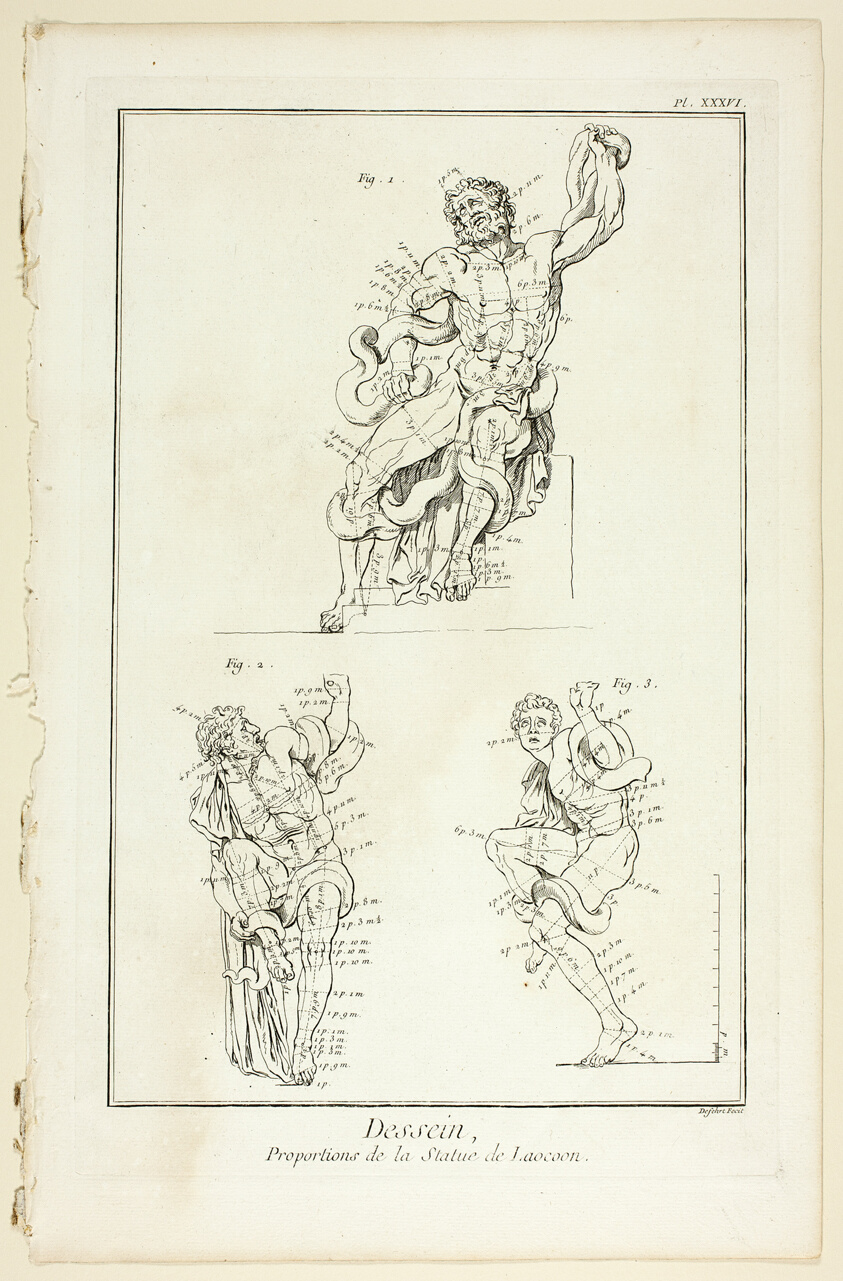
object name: Print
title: Design: Proportions of the Laocoon statue, from Encyclopédie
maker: A. J. Defehrt (French, active 18th century); published by André le Breton (French, 1708-1779), Michel-Antoine David (French, c. 1707-1769), Laurent Durand (French, 1712-1763), and Antoine-Claude Briasson (French, 1700-1775)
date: 1762/77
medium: Etching, with engraving, on cream laid paper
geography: France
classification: etching; print; prints and drawing